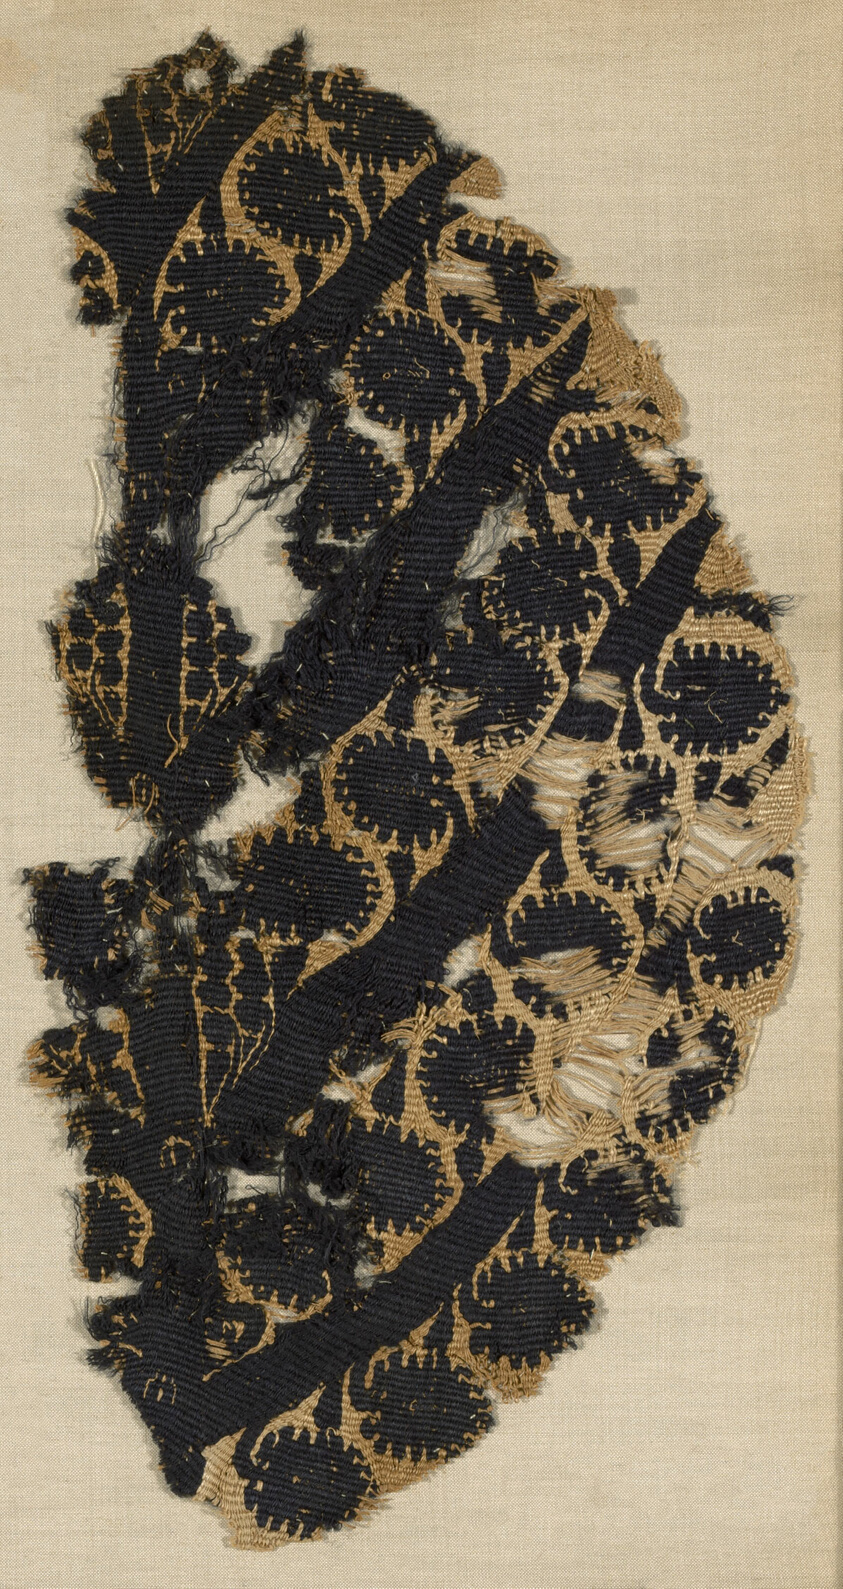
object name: Textile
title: Fragment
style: greco-roman (egyptian)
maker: Egypt, Akhmin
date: Greco–Roman period (30 B.C.–641 A.D.), 3th/4th century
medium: Linen and wool, slit tapestry weave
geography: Egypt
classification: textile; weaving